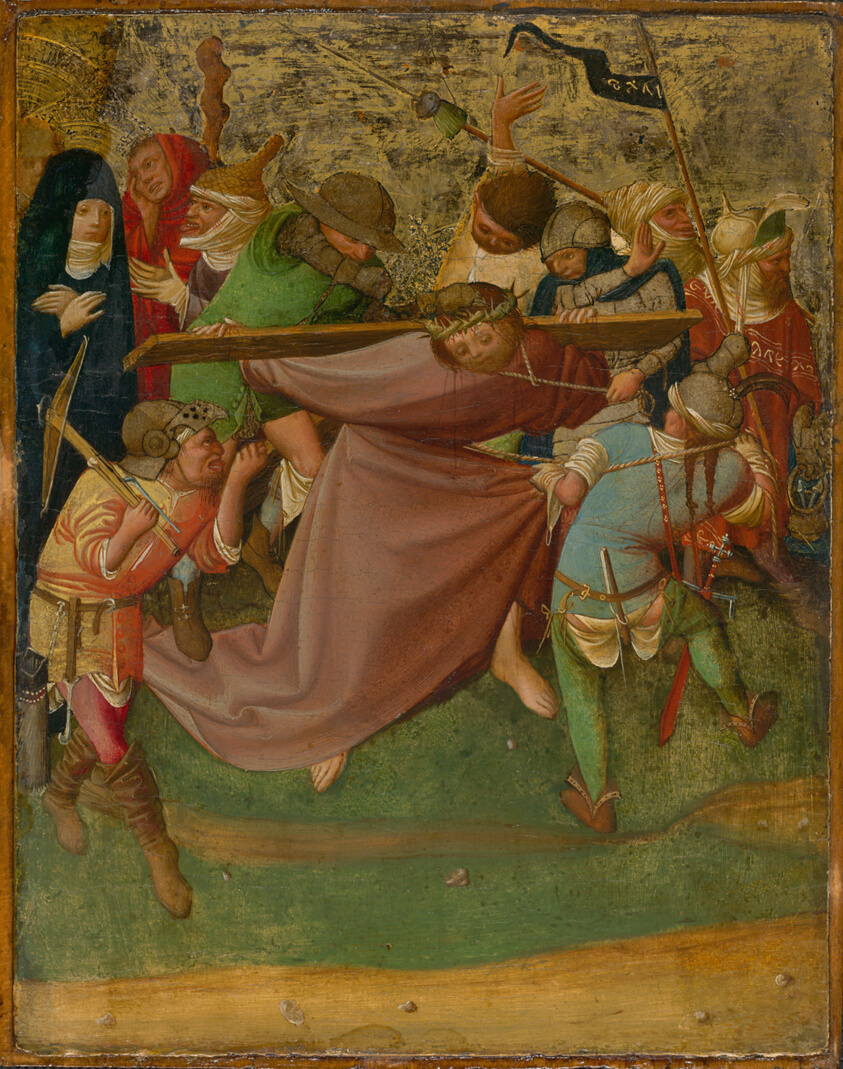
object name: Painting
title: Christ Carrying the Cross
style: 15th century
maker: Master of the Worcester Carrying of the Cross (active c. 1400–c. 1450)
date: c. 1425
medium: Oil on panel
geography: Germany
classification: painting; paint; oil paintings (visual works); oil on panel; german; european painting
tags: Century of Progress, Christian subjects, Christianity, soldiers, Jesus, men, women, blood, flags, Virgin Mary, religion, religious, religious figures, religious scenes, biblical, weapons, crucifixions, spears, knife, swords, violence, helmets, world's fairs, Chicago World's Fairs